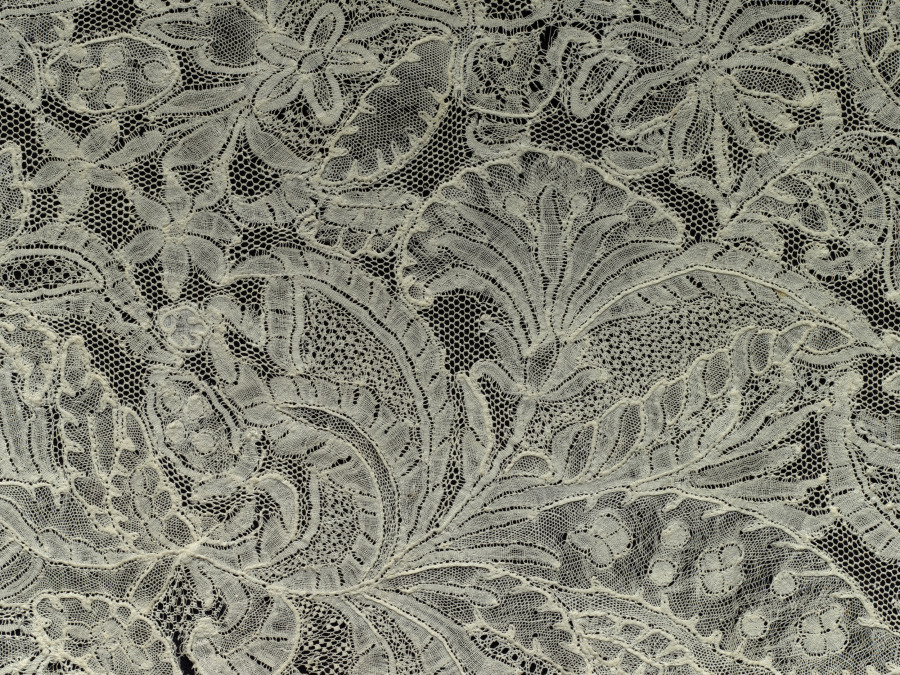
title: Lace Lappet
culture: Belgium, Brussels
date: 1700s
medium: Linen: bobbin lace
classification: Lace